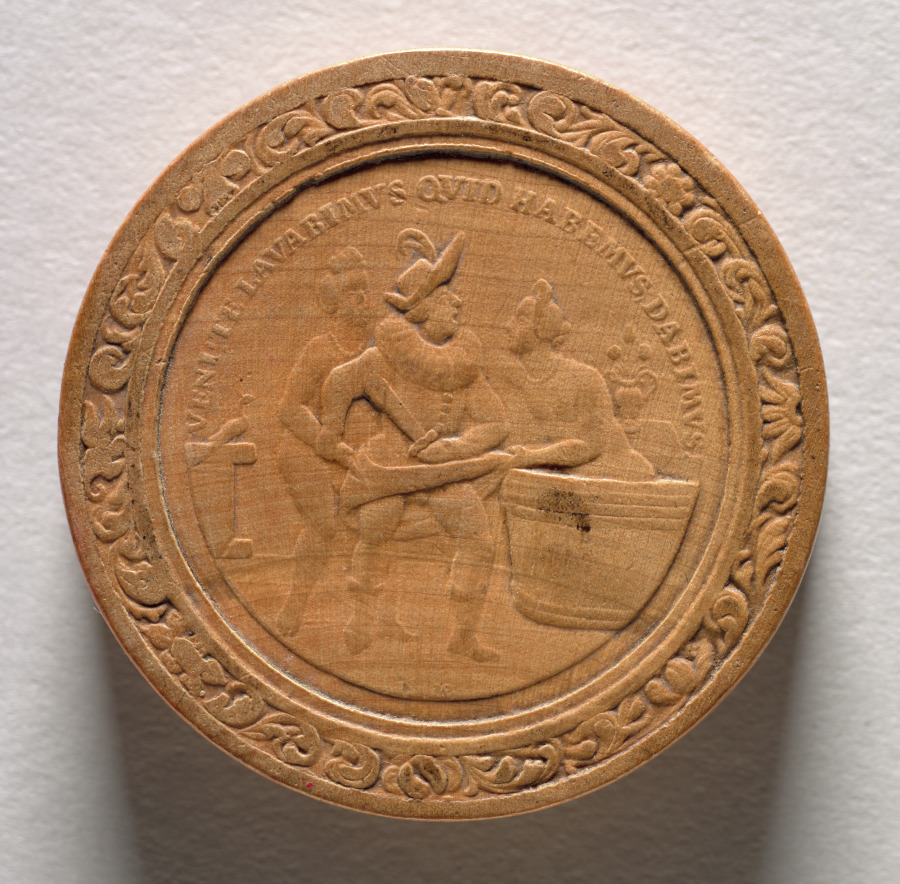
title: Gaming Piece (reverse)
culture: Germany, late 17th-early 18th Century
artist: Martin Brunner (German, 1659–1725)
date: c.1700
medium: wood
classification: Furniture and woodwork